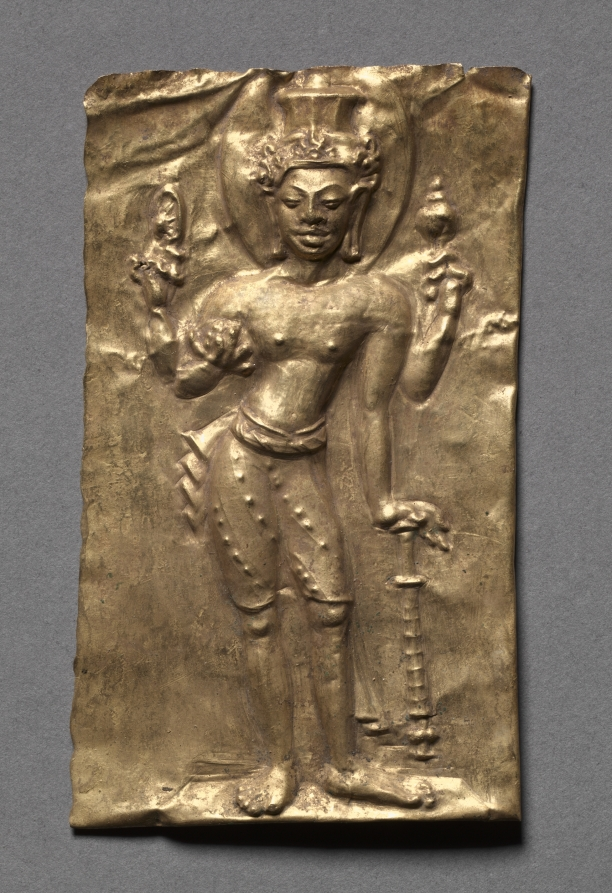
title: Plaque with Vishnu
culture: Thailand, Sri Deb Style, Mon-Dvaravati period, c. 7th-8th Century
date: c. 600s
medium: gold repoussé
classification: Metalwork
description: Images made in India during the Gupta period (AD 300s to 600s) were influential in shaping the early development of Buddhist and Hindu art in Southeast Asia. This gold token depicts the Hindu god Vishnu, identified by the flat-topped crown, his four arms, and attributes: wheel, conch shell, club, and clod of earth. Noteworthy for its naturalism is the foreshortening of his right foot. Such precious gold objects were made to be secreted under a sacred stone icon in Thailand or Cambodia to infuse the temple with wealth and glory.